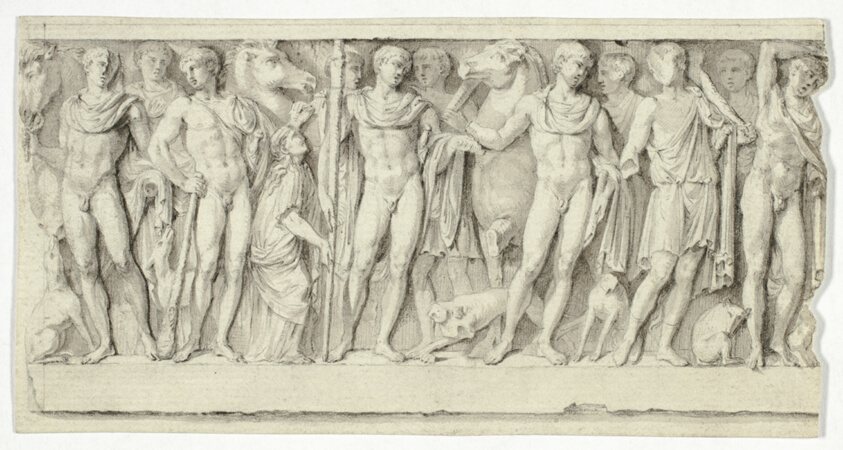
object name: Drawing and Watercolor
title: Copy after Sarcophagus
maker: Unknown Artist; French, 1701-1800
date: 1701-1800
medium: Drawing on paper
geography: France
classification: drawings (visual works); prints and drawing